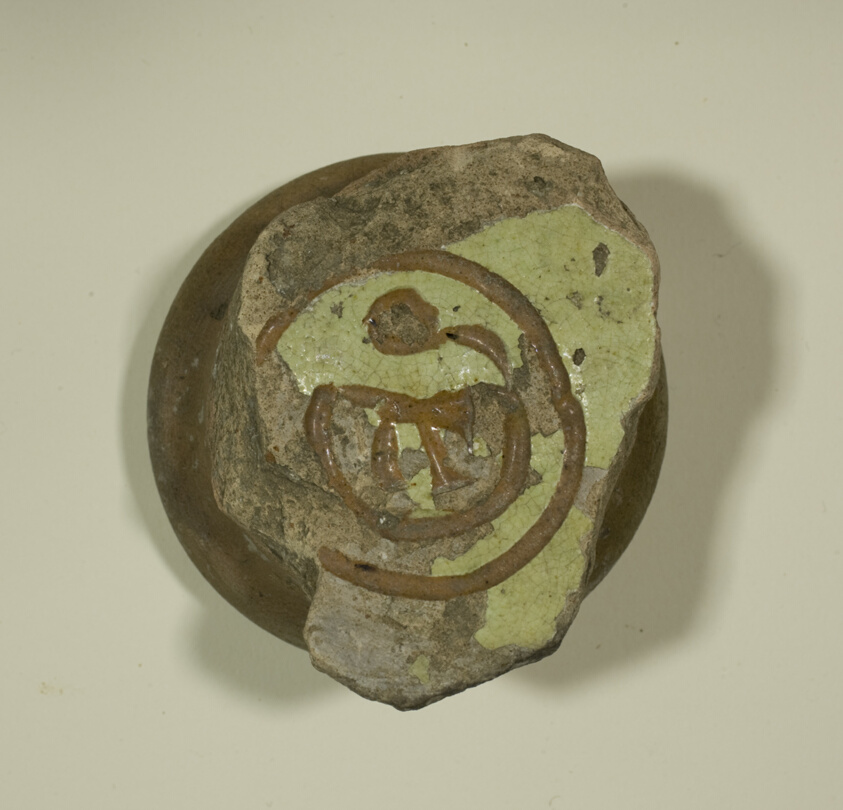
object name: Decorative Arts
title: Fragment of a Bowl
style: byzantine, european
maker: Byzantine (Asia Minor, Constantinople)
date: 13th-14th century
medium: Ceramic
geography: Istanbul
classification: fragment; ceramics; vessel; bowl; asian art; decorative arts